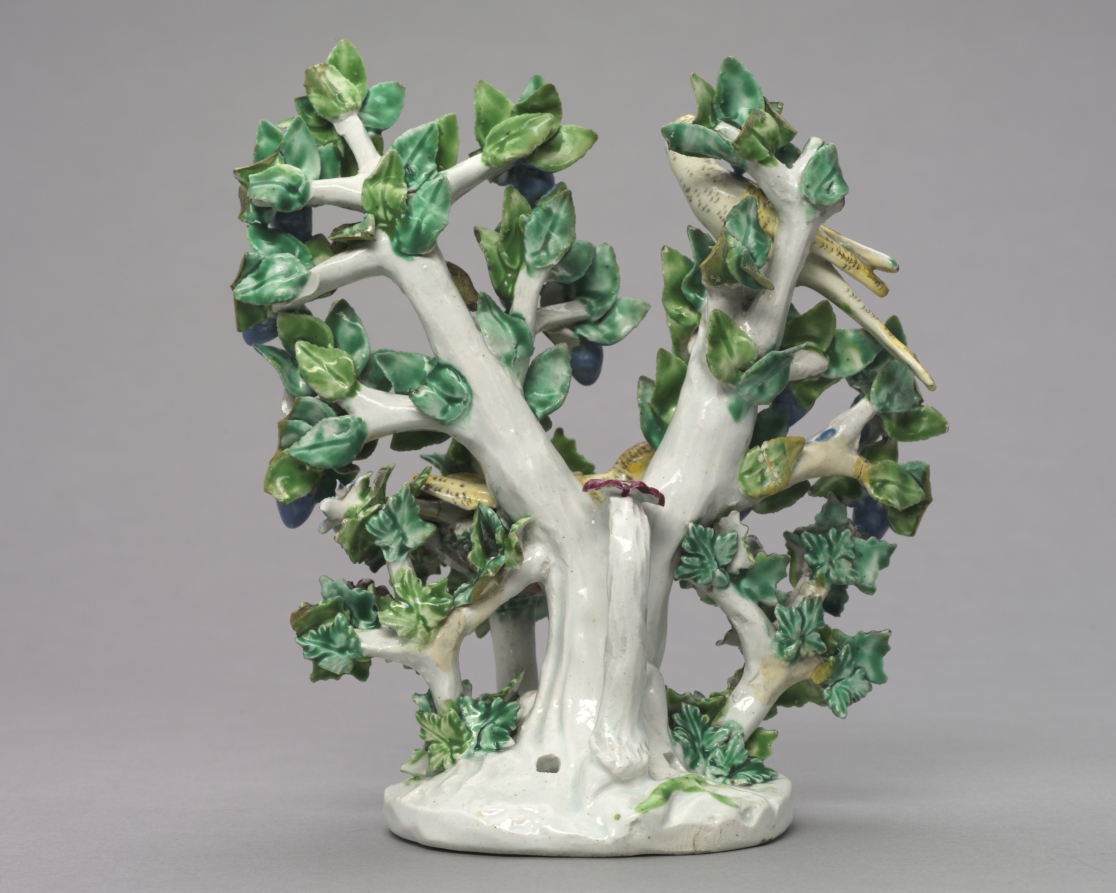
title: Birds and Plum Tree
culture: England, Bow, 18th century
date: 1760–1765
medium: porcelain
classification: Ceramic